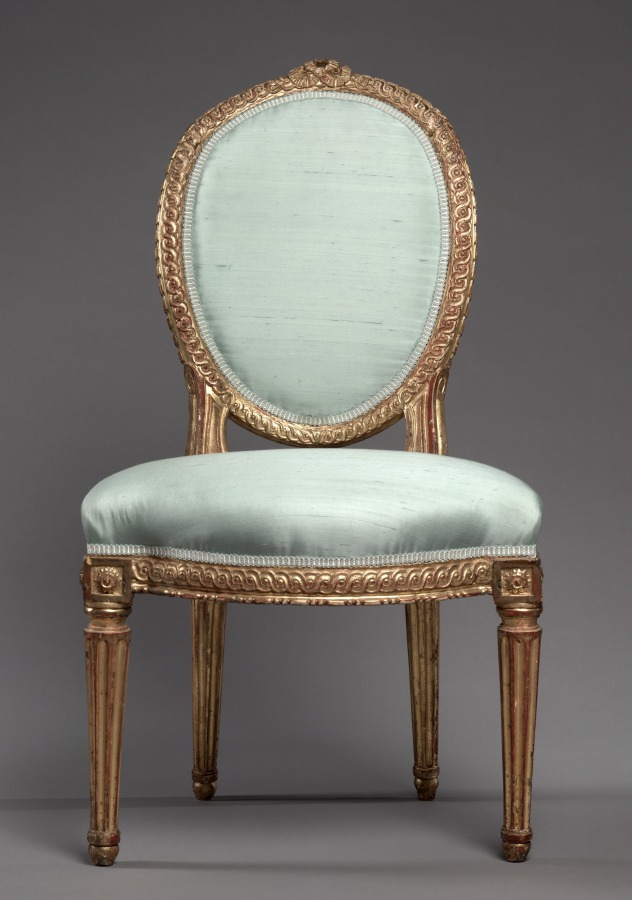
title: Pair of Side Chairs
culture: France, style of Louis XVI, 18th century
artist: Jean Baptiste fils Lelarge (French, 1743–1802)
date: 1700s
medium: gilded wood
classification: Furniture and woodwork